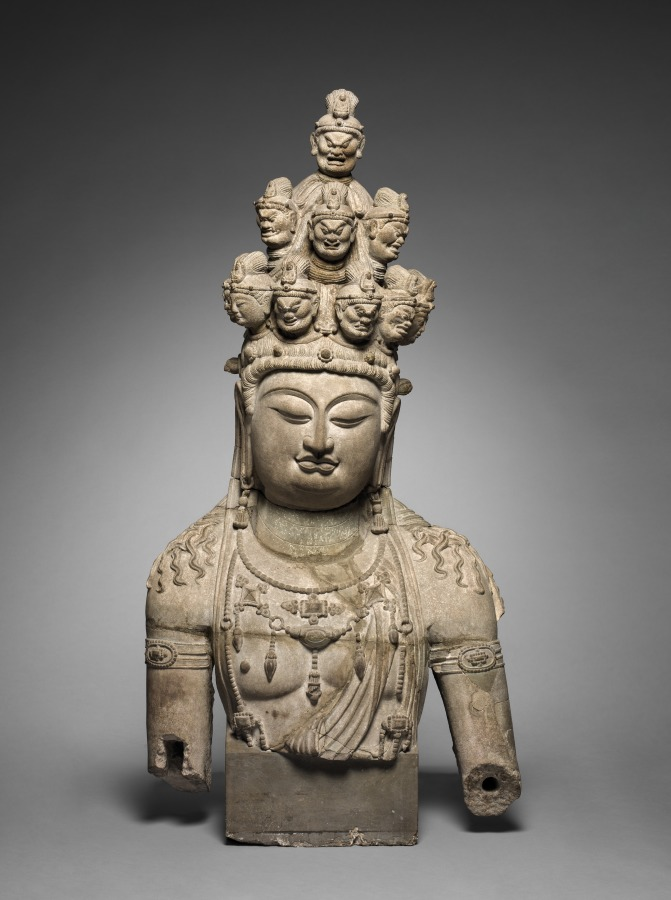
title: Eleven-Headed Guanyin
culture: China, Tang dynasty (618-907)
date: early 700s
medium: gray sandstone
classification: Sculpture